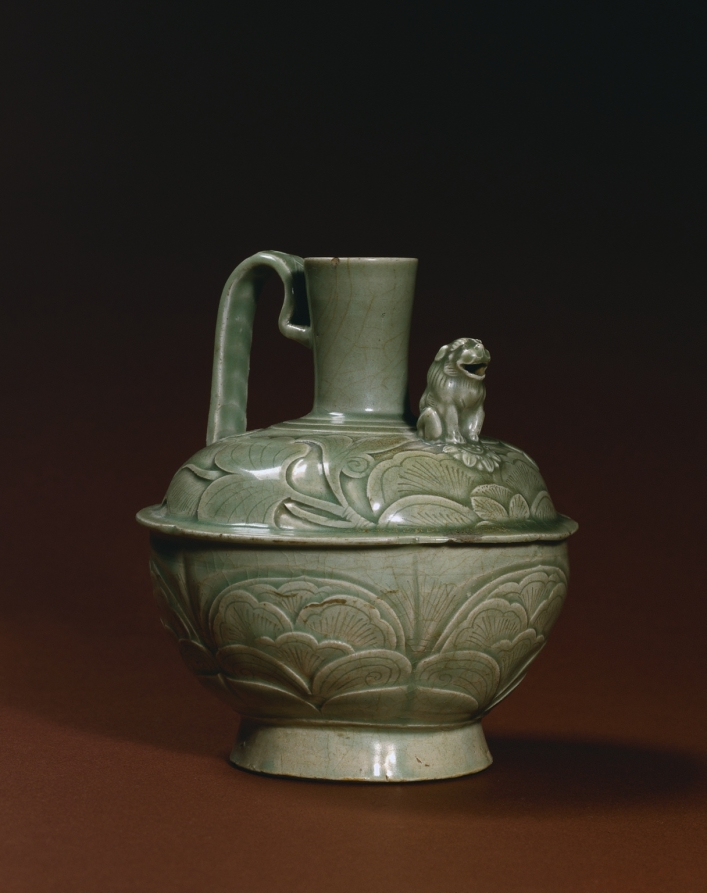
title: Ewer with a Lion-shaped Spout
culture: China, Shaanxi province, Tongchuan, Huangbaozhen, Five Dynasties period (907-960) or Northern Song dynasty (960-1126)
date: 900s–1000s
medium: green-glazed porcelaneous stoneware with modeled, carved and incised decoration, Yaozhou ware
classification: Ceramic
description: This remarkable ewer is most likely a very early and rare type of Yaozhou ware, with the shape and decoration recalling Tang metal ware. High quality pieces like this might have been sent as tribute to the Northern Song court. Yaozhou ware, or northern celadon, appeared to have been made in the north in emulation of the southern Yue ware. But its green glaze has a deep olive-green tone, and potters fully exploited the contrasting tones of the glaze over the incised and carved decoration to create rich textural effects.